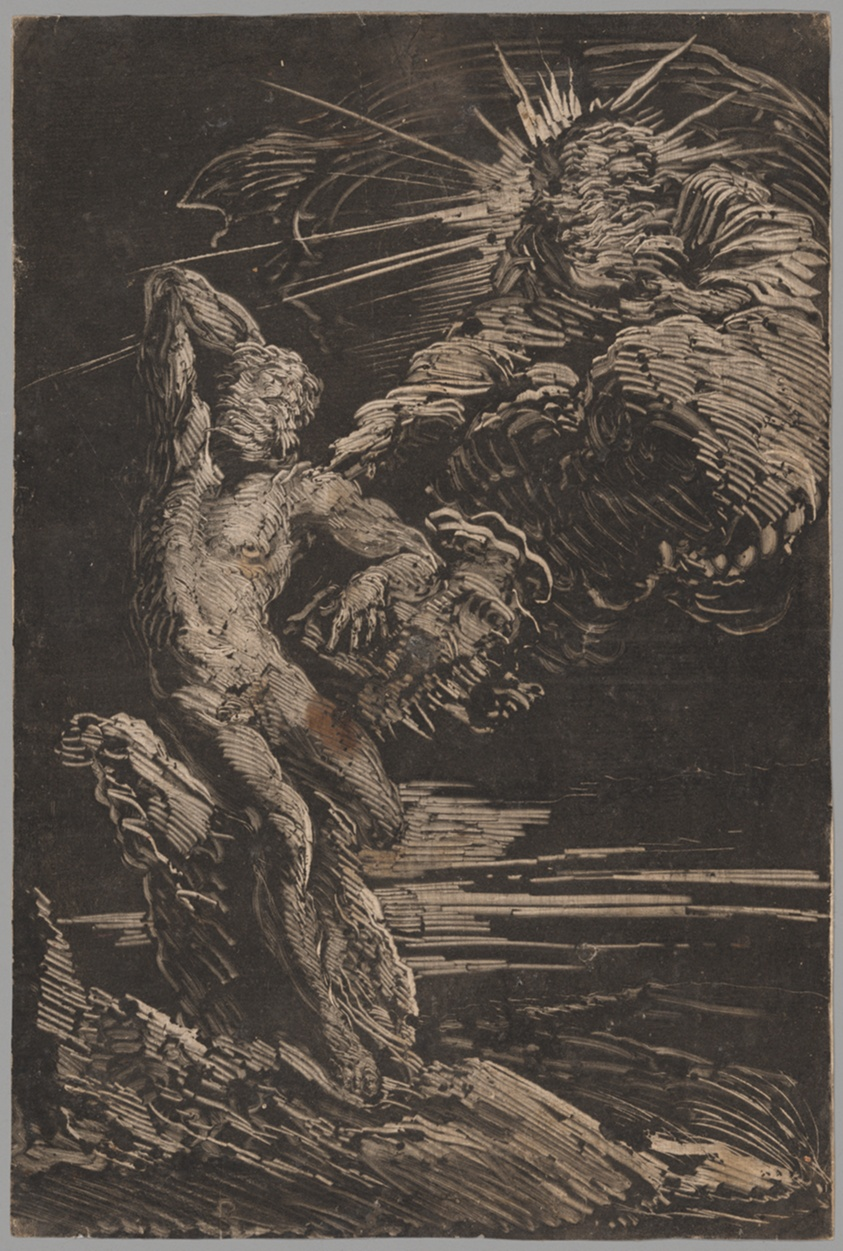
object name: Print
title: The Creation of Adam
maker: Giovanni Benedetto Castiglione (Italian, 1609-1664)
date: c. 1645/50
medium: Monotype in black ink on ivory laid paper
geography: Italy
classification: monotype; print; prints and drawing; paper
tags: Adam (Biblical), gods (deities), mythology, religion, Christianity, Christian subjects